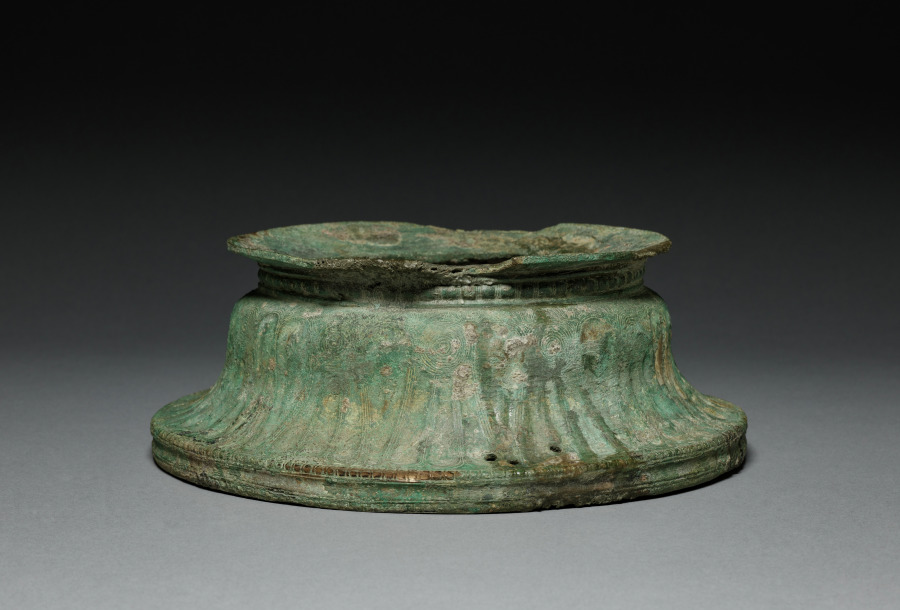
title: Bronze Volute Krater Base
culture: Greece, Laconia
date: late 600s BCE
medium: bronze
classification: Metalwork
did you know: This object supported a large vessel used for mixing wine with water called a krater.